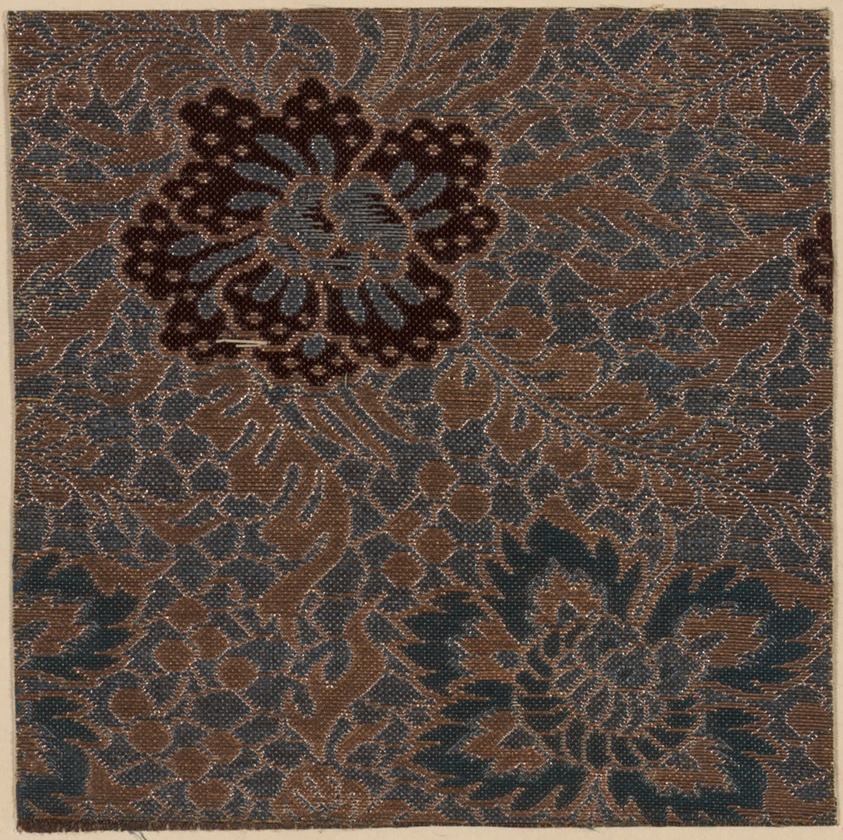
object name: Textile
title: Fragment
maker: Japan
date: Edo period (1615–1868), 1775/1825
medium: Plain compound cloth, silk & gilt & silvered paper; 2 1/2 strips to m.m.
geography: Japan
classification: textile; weaving